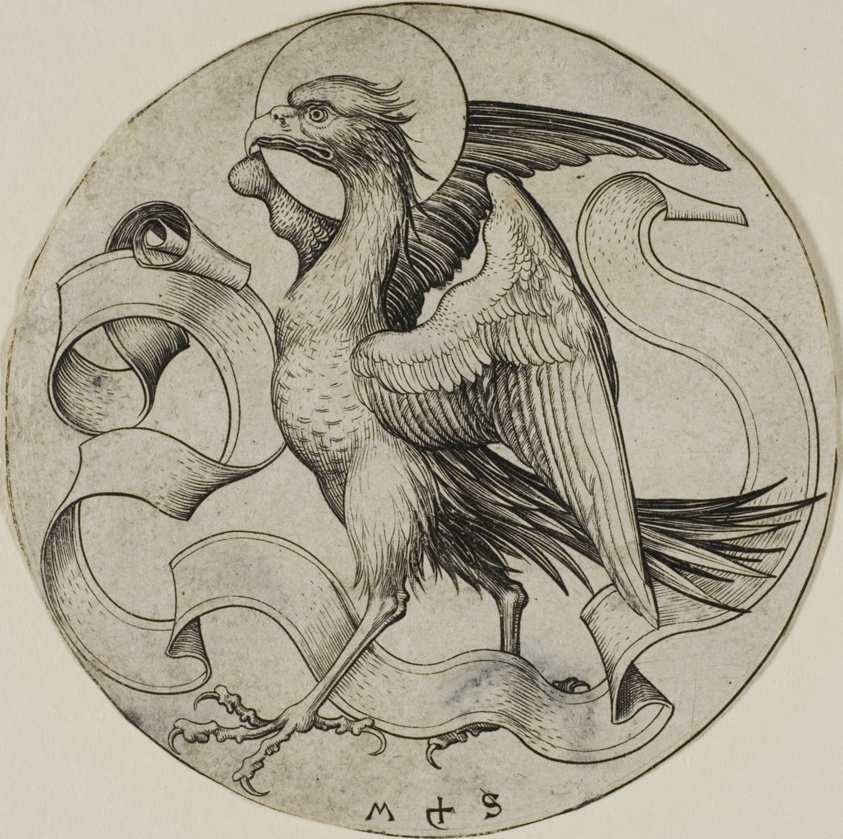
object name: Print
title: The Eagle of St. John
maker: Martin Schongauer (German, c. 1430/50-1491)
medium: Engraving on paper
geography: Germany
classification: engraving; print; prints and drawing